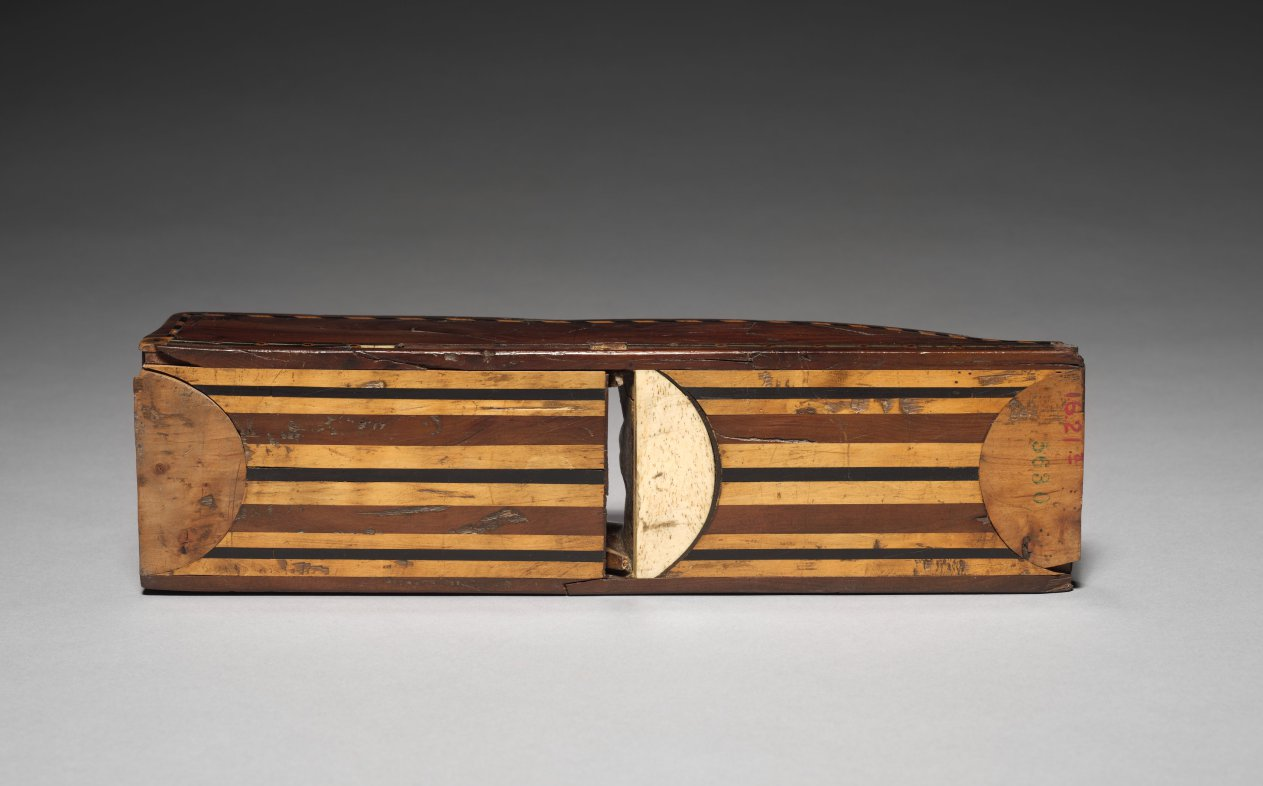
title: Carpenter's Plane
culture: Italy, late 17th century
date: late 1600s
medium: wood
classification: Tool